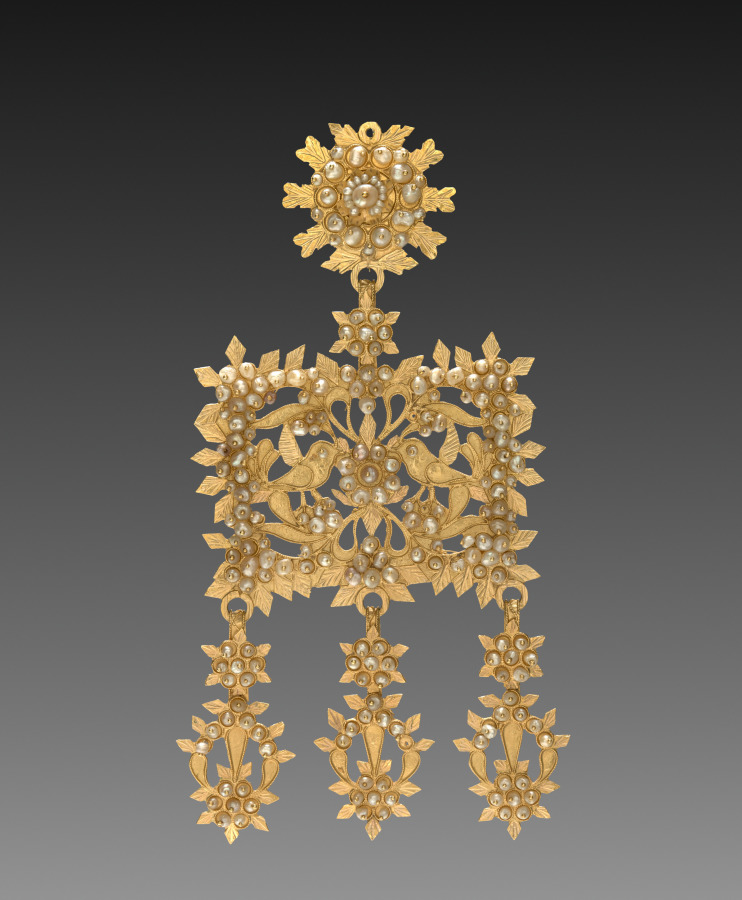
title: Earring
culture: Italy, Sardinia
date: 1700s - 1800s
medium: gold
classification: Jewelry